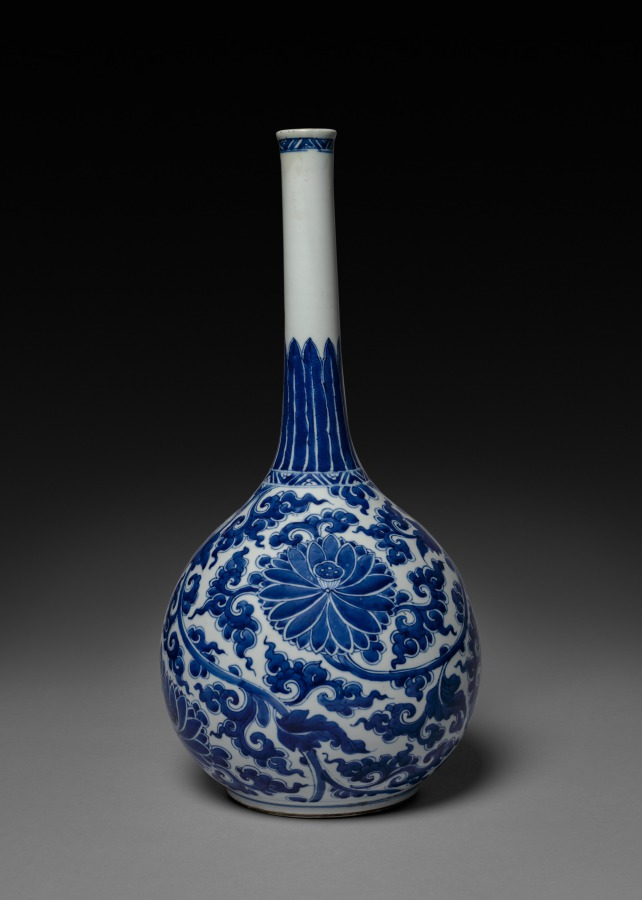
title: Bottle-shaped Vase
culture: China, Qing dynasty (1644-1911), Kangxi reign (1662-1722)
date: 1662–1722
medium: porcelain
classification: Ceramic